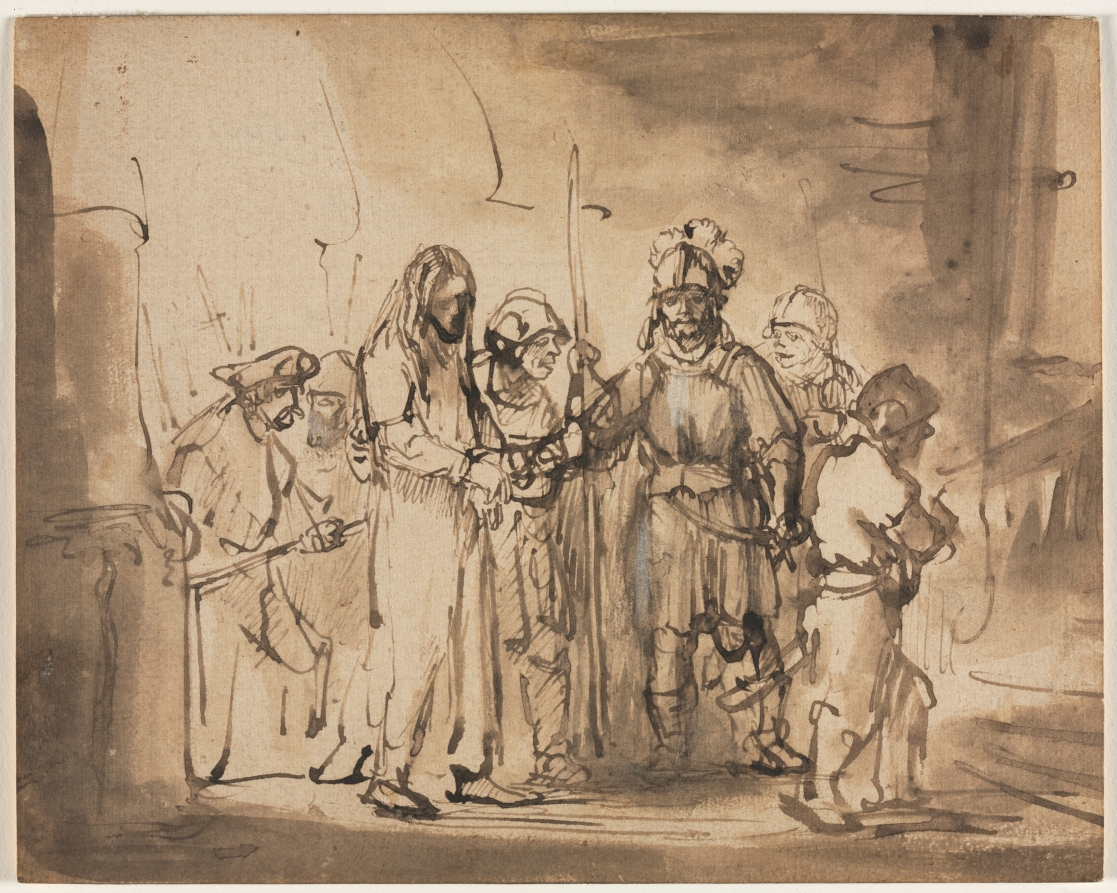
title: Christ Taken before Caiaphas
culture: Netherlands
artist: studio of Rembrandt van Rijn (Dutch, 1606–1669)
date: c. 1641–42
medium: pen and brown ink and brush and brown wash, with white gouache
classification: Drawing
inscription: VERSO, through transmitted light, upper right, in ink(?): [illegible] / [6601?] ; VERSO OF SECONDARY SUPPORT, upper left, in graphite: HJH [first two letters crossed out] ; upper center, in graphite: Rembrandt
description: The first drawing purchased by the museum as a Rembrandt is now considered by experts to have been made by a follower of the Dutch artist. The scene depicts Christ being led to his first interrogation after his capture in Gethsemane (John 18:12–14), an unusual subject that may be paraphrasing the traditional portrayal of Christ carrying the cross. Here, the exhausted figure of Christ, contrasted with the brutal features and cruel gestures of the soldiers, produces an image that resonates with emotion. However, stylistic details, particularly the use of wash that creates a vague space and the lack of clarity and directness in Christ's face, suggest that this drawing was executed by a student or follower working in Rembrandt's style.